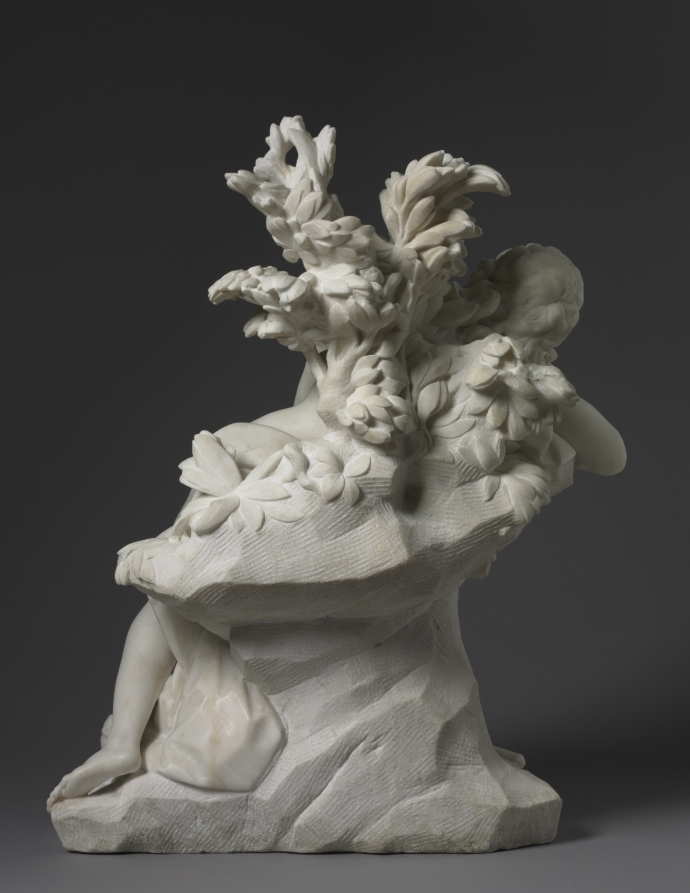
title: Sleeping Endymion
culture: Italy, 18th century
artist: Agostino Cornacchini (Italian, 1686–1754)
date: 1716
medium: marble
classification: Sculpture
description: Cornacchini moved away from the dramatic movement and light effects characteristic of baroque sculpture toward a calmer, gentler, more graceful style favored by 18th-century taste. This sculpture depicts Endymion, a beautiful young shepherd from Greek mythology. His beauty so entranced Selene, the personification of the moon, that she asked Zeus to grant Endymion immortality. Zeus did so, but only after placing Endymion in an eternal sleep.